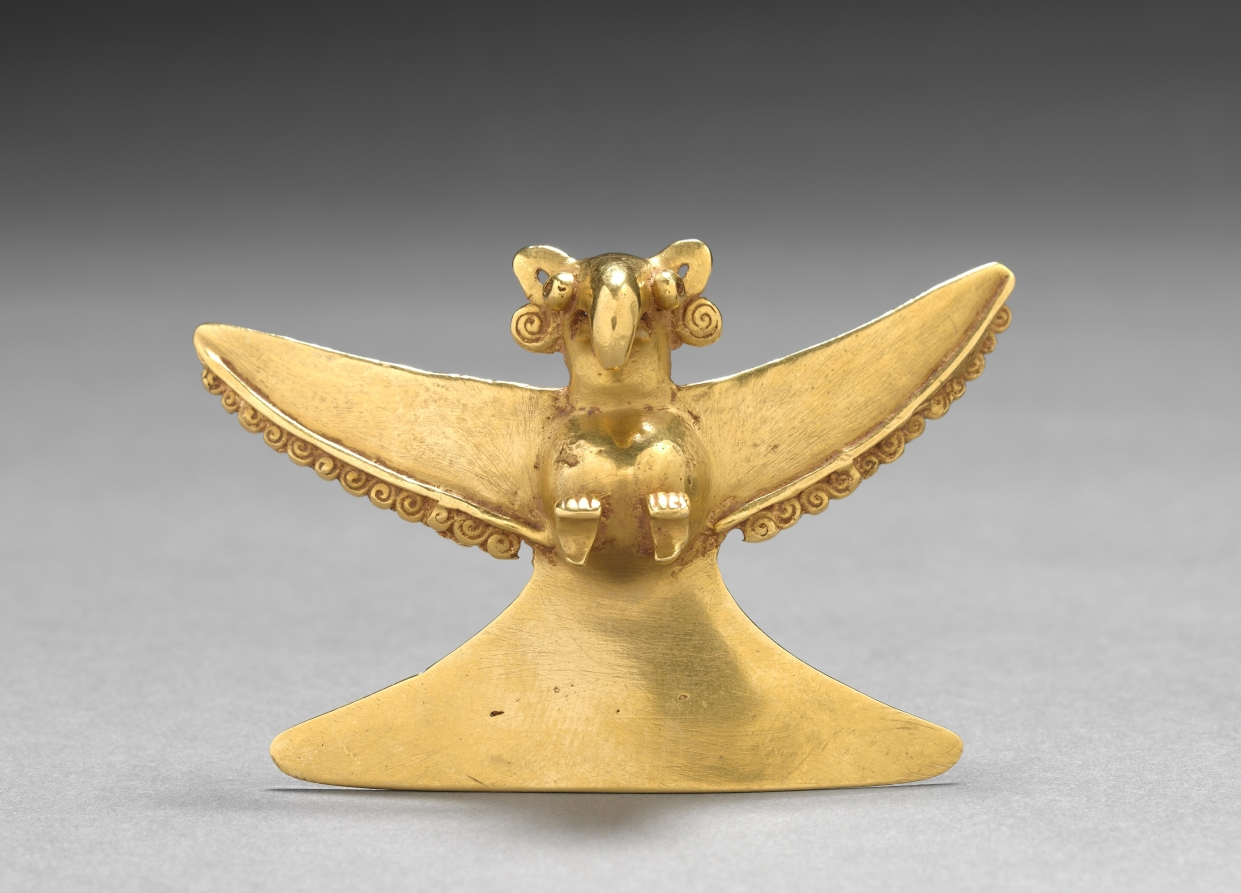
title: Eagle Pendant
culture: Western Panama, Veraguas-Gran Chiriquí Style, 11th-16th century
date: c. 1000–1550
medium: cast and hammered gold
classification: Metalwork